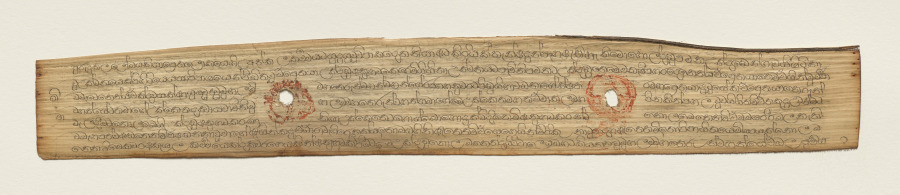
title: Leaf from a Buddhist Manuscript (recto)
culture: Sri Lanka, Singhalese, Late 17th century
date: c. 1700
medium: fiber paper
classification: Manuscript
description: Palm leaf material is still used for manuscripts in Sri Lanka. The palm leaves are prepared first by boiling them, drying them in the sun, and then rubbing them with oils. Scribes then use a metal stylus to incise the text. Then charcoal powder is wiped across the pages, filling in only the inscribed lines.